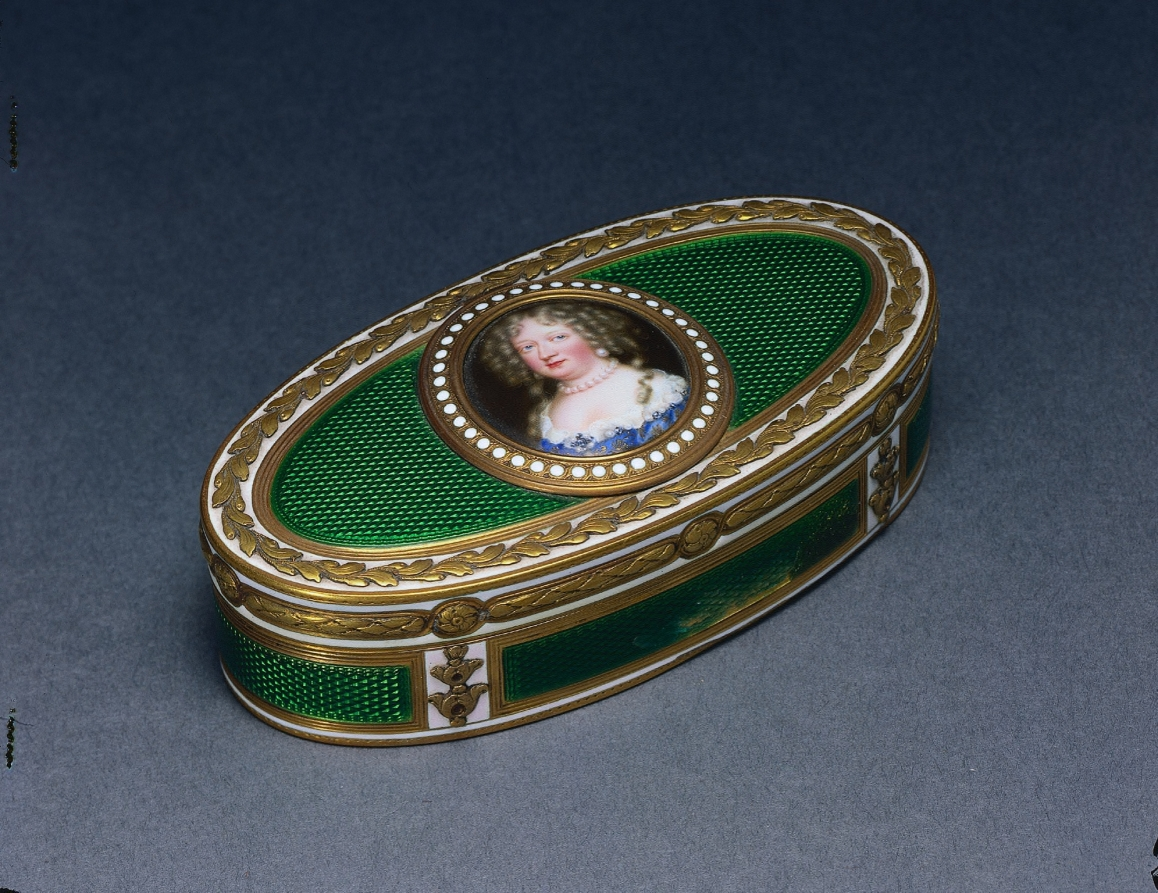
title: Snuff Box (Tabatière) with Portrait of Marie-Thérèse of Austria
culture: France, 18th century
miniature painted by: Jean Petitot (Swiss, 1607–1691)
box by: Charles Le Bastier (French)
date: miniature, c. 1676; box, 1775–76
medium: Gold, enamel, and miniature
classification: Enamel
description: In 18th-century France, ornately enameled boxes that held snuff—powdered tobacco—became a popular accessory in the French court. This box is decorated with a miniature portrait of Marie-Thérèse of Austria, the queen consort of French King Louis XIV. Their union was largely political. A year into their marriage Louis XIV took an official mistress, Madame Pompadour.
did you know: This box resulted from the combined efforts of the popular portrait painter who served the court of French King Louis XIV, Jean Petitot, and master goldsmith Charles Le Bastier.